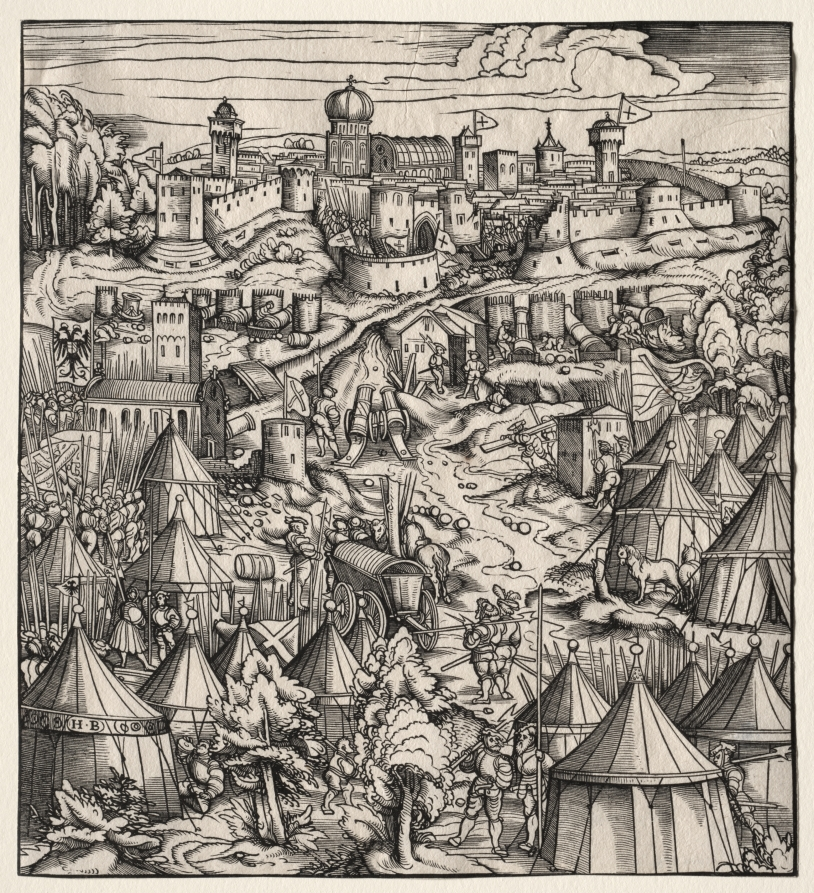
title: Der Weisskunig (The White King): The Siege of Padua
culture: Germany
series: Der Weisskunig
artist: Hans Burgkmair (German, 1473–1531)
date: 1512–1515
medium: woodcut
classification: Print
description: These woodcuts depicting military campaigns are illustrations for Der Weisskunig, or The White King, a fictionalized biography of Holy Roman Emperor Maximilian I (reigned 1486–1519). Written in German, the book takes the form of a courtly romance novel featuring armored knights. The hero, Maximilian, is the White King. The Blue King and his party represent France. Maximilian was the earliest Renaissance prince to extensively use printed images and texts to cultivate his authority and spread his ideology. Der Weisskunig is one of several major print projects sponsored by the emperor and executed by a legion of advisors, authors, designers, and craftsmen.